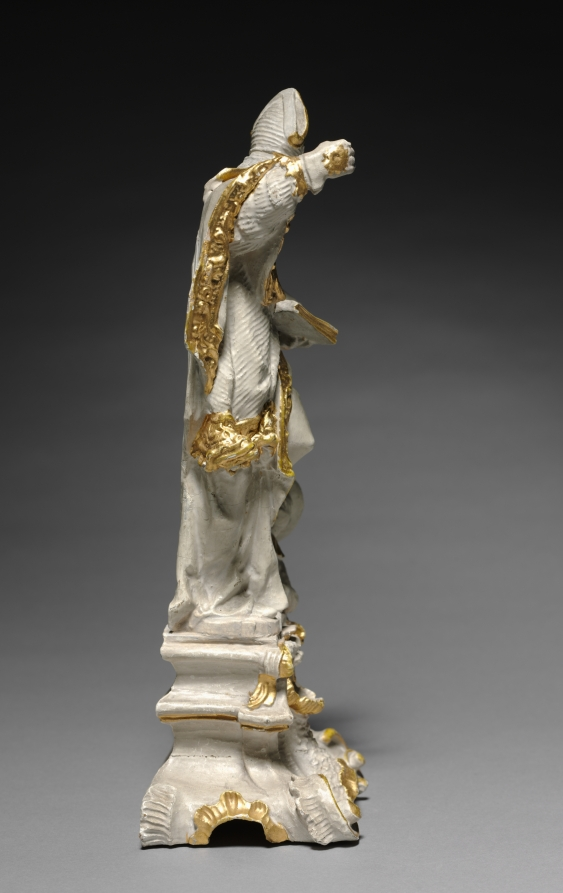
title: Bishop Saint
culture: Germany, 18th century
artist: attributed to Ferdinand Tietz (Austrian, 1708–1777)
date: c. 1740–1750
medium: painted and gilded wood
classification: Sculpture